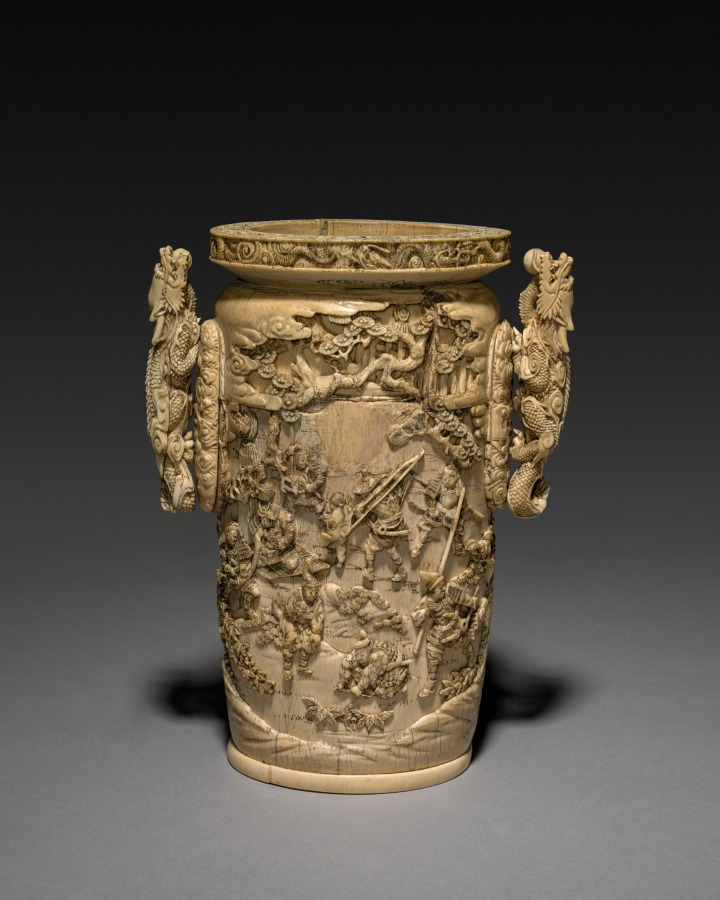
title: Carved Vase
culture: Japan, Edo period (1615–1868) to Meiji period (1868–1912)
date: 1800s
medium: ivory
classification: Ivory